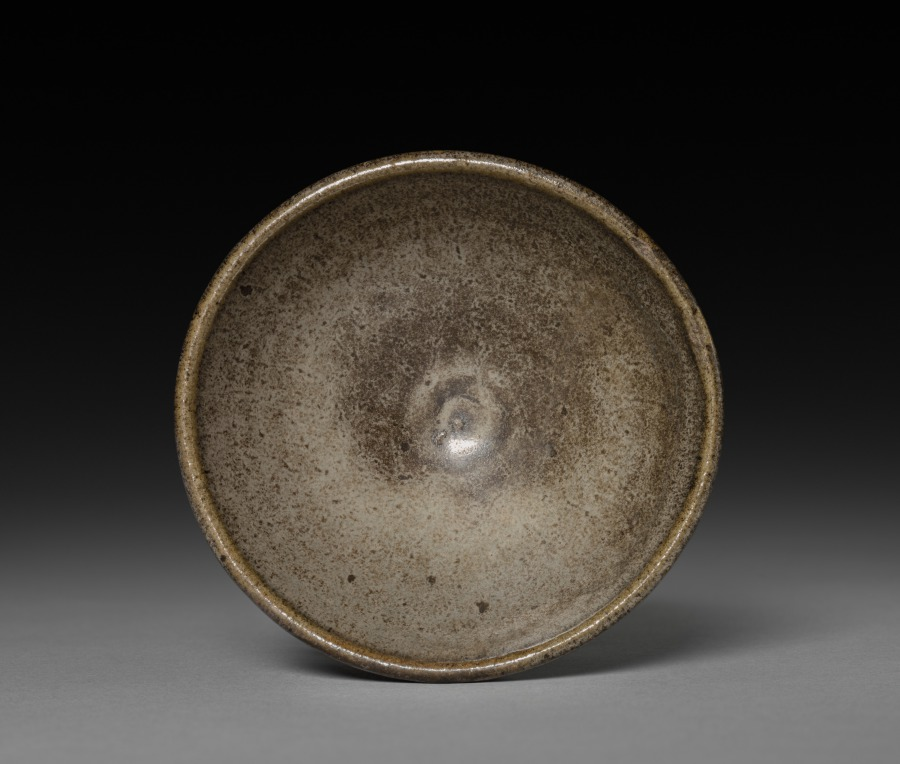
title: Tea Bowl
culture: China, Fujian province, Song dynasty (960-1279)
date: 960–1279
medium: stoneware, Jian ware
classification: Ceramic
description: This brownish-black stoneware tea bowl has rounded sides. Its mottled and blurred green-gray and brown glaze stop short of the foot.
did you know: Jian ware was very popular with the tea cultures in China and Japan.